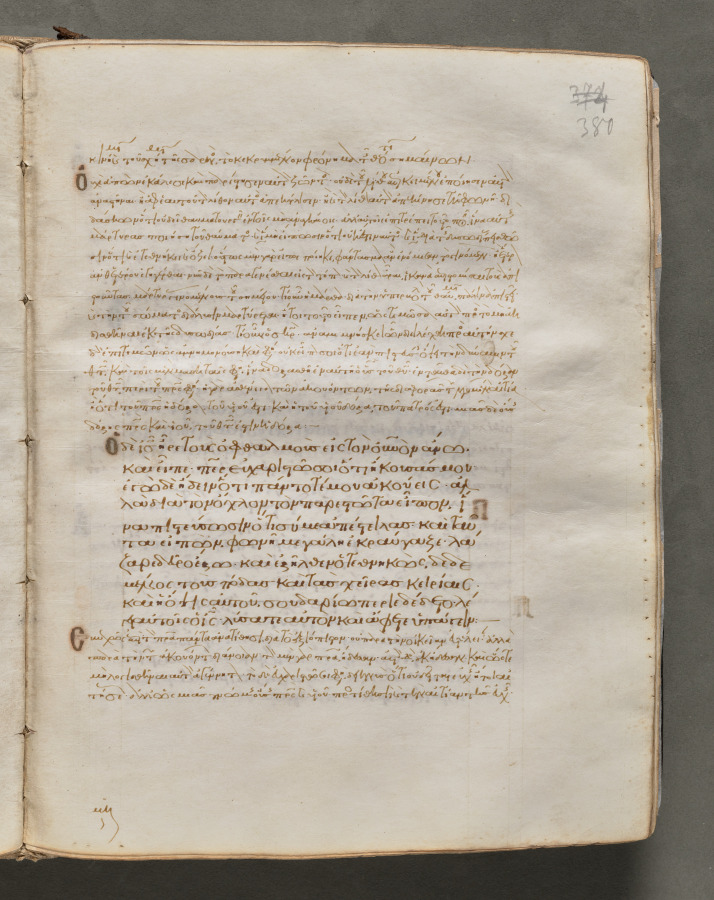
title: Text, folio 380 (recto), from a Gospel Book with Commentaries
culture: Byzantium, Constantinople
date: c. 1000–1100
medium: ink, tempera, and gold on vellum; leather binding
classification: Bound Volume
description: Each of the four gospels in this book opens on a page with brilliantly illuminated borders depicting the author of the text as well as birds—principally peacocks, symbols of the immortality of the soul—and fountains, representing the fountain of life and the salvation of the soul. This volume consists of 428 leaves with texts in Greek. Its level of sophistication suggests that it was probably written and decorated in a monastery in Constantinople.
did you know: Gospel books were carried in procession through Byzantine churches.